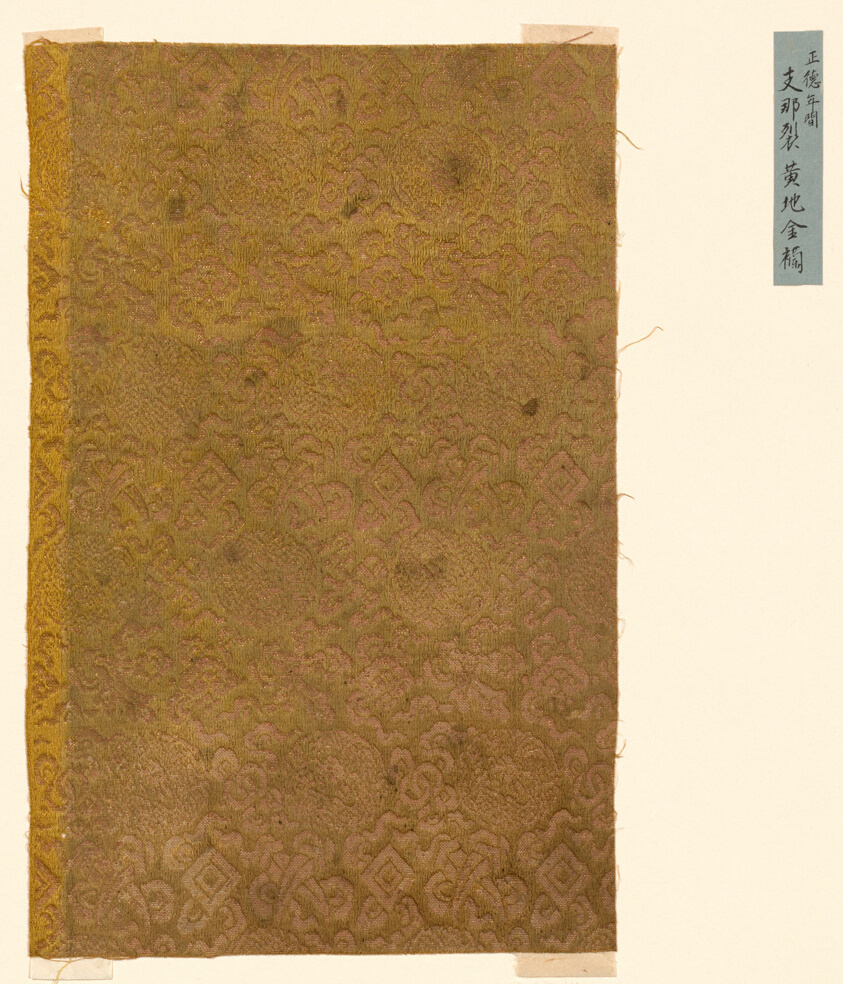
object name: Textile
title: Fragment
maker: China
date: 18th century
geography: China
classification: textile; weaving